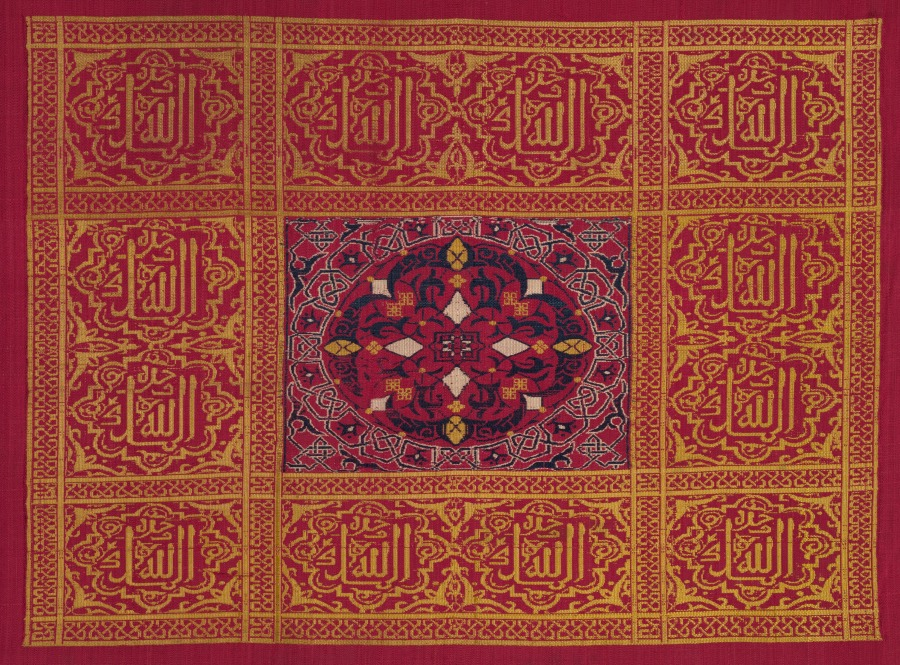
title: Silk curtain from the Alhambra palace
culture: Spain, Granada, Nasrid period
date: 1300s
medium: lampas and taqueté: silk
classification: Textile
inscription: the bold knotted Kufic inscription in the top and bottom borders of the side panels repeats the Arabic word "felicity." Within the arches forming a frieze in the top border is a Kufic inscription "good fortune" and a Naskhi inscription repeating trhe motto of the Nasrid dynasty, "There is no conqueror but God." In the borders of the three large ornamental rectangles on each side panel is the Naskhi inscription "Dominion belongs to God alone." On the central panel the inscriptions in the borders repeat the phrase, "Majestry is God's," while the Nasrid motto, "There is no conqueror but God" and, above, "Blessing," are inscribed in the arabesque ogives.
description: This is one of two of the largest, most complete, and most ornate curtains to survive from the 1300s when it presumably hung in the royal Alhambra Palace in Granada, the last Muslim stronghold in Spain. Its style, artistic vocabulary, and harmonious proportions reflect the magnificent wall decoration in the Alhambra. The motto of the ruling Nasrid dynasty, "There is no conqueror but God," is inscribed in the end borders and central panel. The inscribed striped silk forming the central panel is more worn, suggesting that it was recycled, most likely during the 1300s.